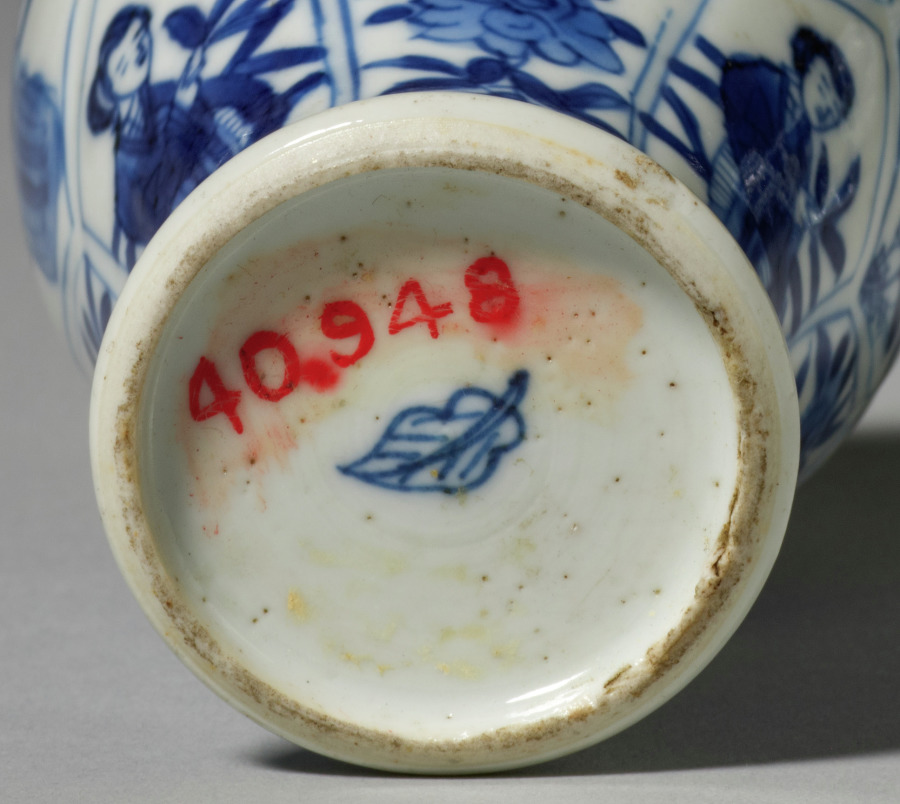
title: Jar with Cover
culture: China, Qing dynasty (1644-1911)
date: 19th Century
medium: porcelain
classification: Ceramic